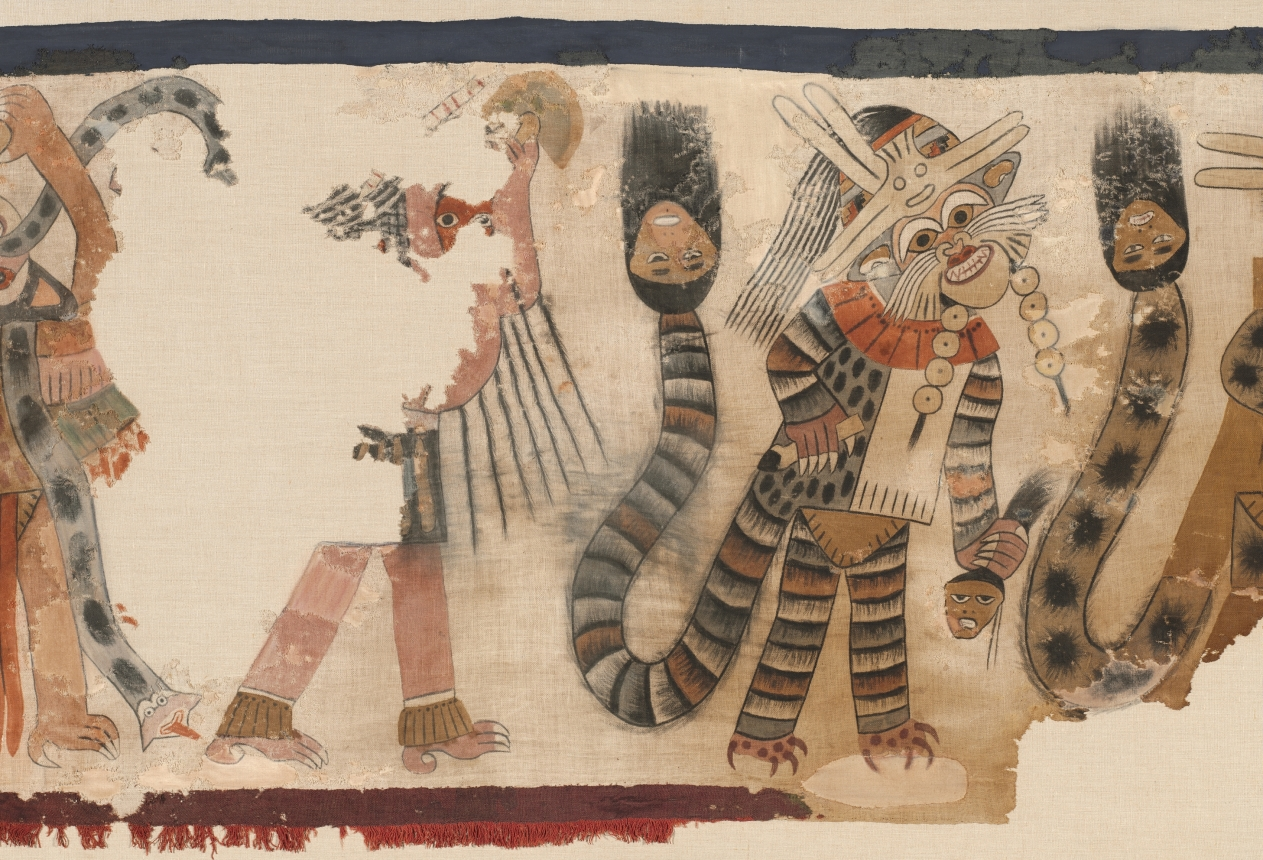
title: Cloth with Procession of Figures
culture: Central Andes, South Coast, Nasca people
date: 170 BCE–70 CE (radiocarbon date, 95% probability)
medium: cotton and pigment (field); camelid fiber (borders and fringe)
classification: Textile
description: Experts agree that this cloth is one of the greatest paintings to survive from Andean antiquity due to the realism, complexity, large size, and refined execution of its figures. All but one of the figures wear the whiskered mouth mask of Nasca supernatural beings and several carry or wear severed human heads, which the Nasca linked to nature’s fruitfulness. Thus, the figures seem to represent supernatural forces or humans personifying such forces during a ritual devoted to agricultural fertility. Originally, the panel was attached along its upper edge to a dark blue cloth of equal size. The complete textile may have served as a mantle (a shawl-like garment), a hanging, or a funerary offering.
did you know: Characteristics of the pampas cat and the emperor tamarin monkey are visible in the marching figures.